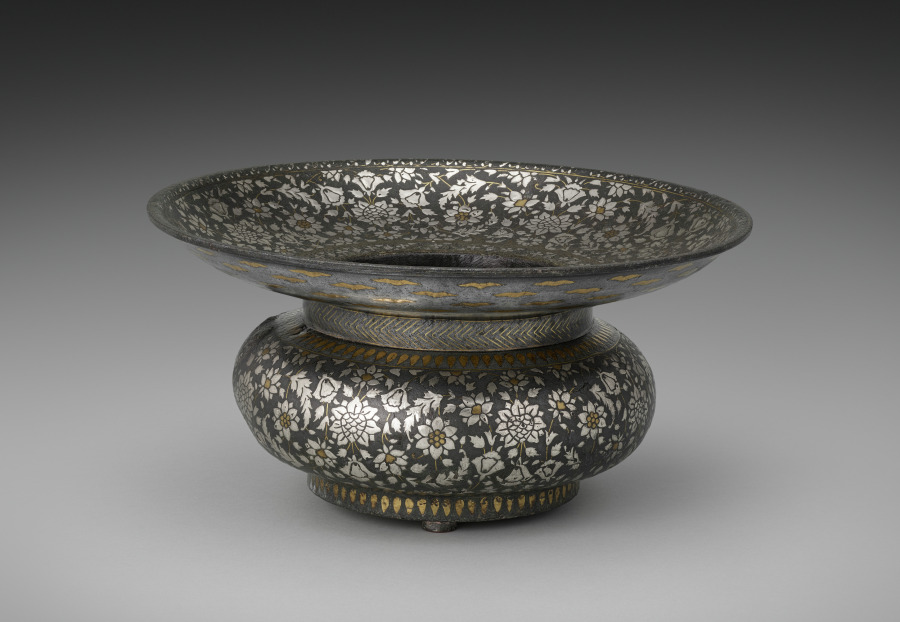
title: Bidri Basin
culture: Southwestern India, Deccan, Karnataka, Bidar​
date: c. 1650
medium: Zinc alloy with silver and brass inlay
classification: Metalwork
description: Wide-rimmed basins called sailabchi were used to catch water poured from a pitcher during hand washing before prayer and before and after meals. A sumptuous example such as this was made for an elite setting. Every element of the allover floral arabesque was cut from silver and brass sheets or wire and hammered into the cast zinc alloy vessel in a distinctive technique developed in southern India.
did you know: Zinc alloy does not rust or corrode, in contrast to steel or copper alloys.